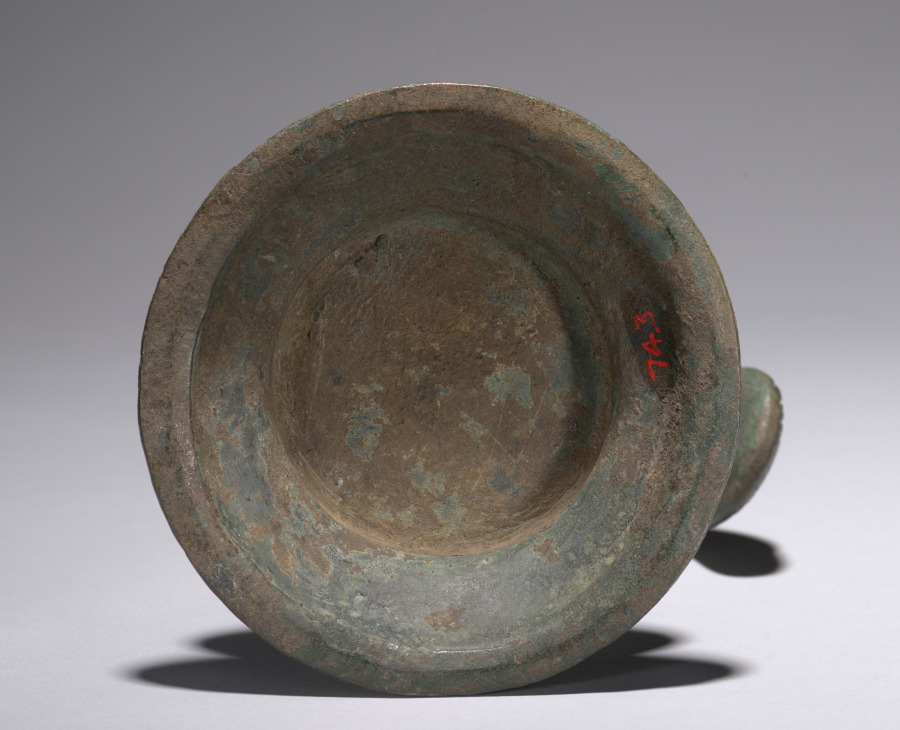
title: Ibis Eating a Lizard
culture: Italy, Rome, Roman Empire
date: 100 BCE–100 CE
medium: bronze, hollow cast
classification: Sculpture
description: The ibis is an Egyptian bird, shown here standing firmly on both legs with a lizard in its beak. The bird rests on a two-tiered circular base, and a vertical stem with incised decoration extends above the ibis’s head. While an Egyptian animal, the image of the ibis devouring a lizard became common only in the Roman world, depicted in wall paintings and seen on Barbotine ware, a type of pottery. This sculpture may be unique, however, in showing this motif in the round.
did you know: This sculpture was possibly used as a support for furniture, a candelabrum, or an incense burner.